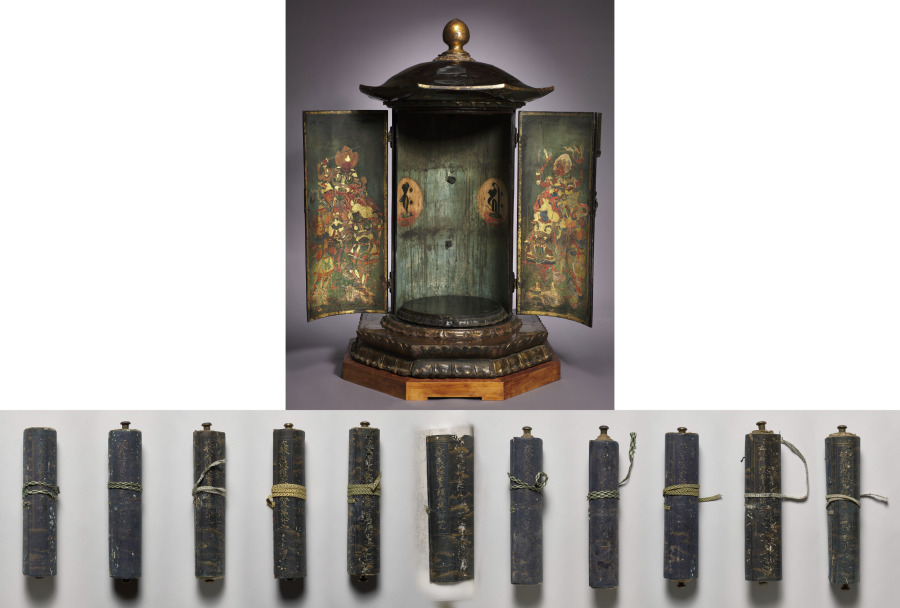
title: Repository for the Great Perfection of Wisdom Sutra and Eleven Volumes of the Great Perfection of Wisdom Sutra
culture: Japan, Heian period (794–1185)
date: late 1100s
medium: lacquered wood with ink, color, gold, cut gold, and metalwork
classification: Lacquer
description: This repository is one of a pair that once contained the scrolls of a religious text called the Great Perfection of Wisdom Sutra. Two discs painted on the back have the sacred syllables representing the Buddha Shakyamuni and the Buddha Amida. Eight of the 16 benevolent but fierce looking deities who protect the text appear on the doors.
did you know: The mate to this object is in the Nara National Museum in Japan.